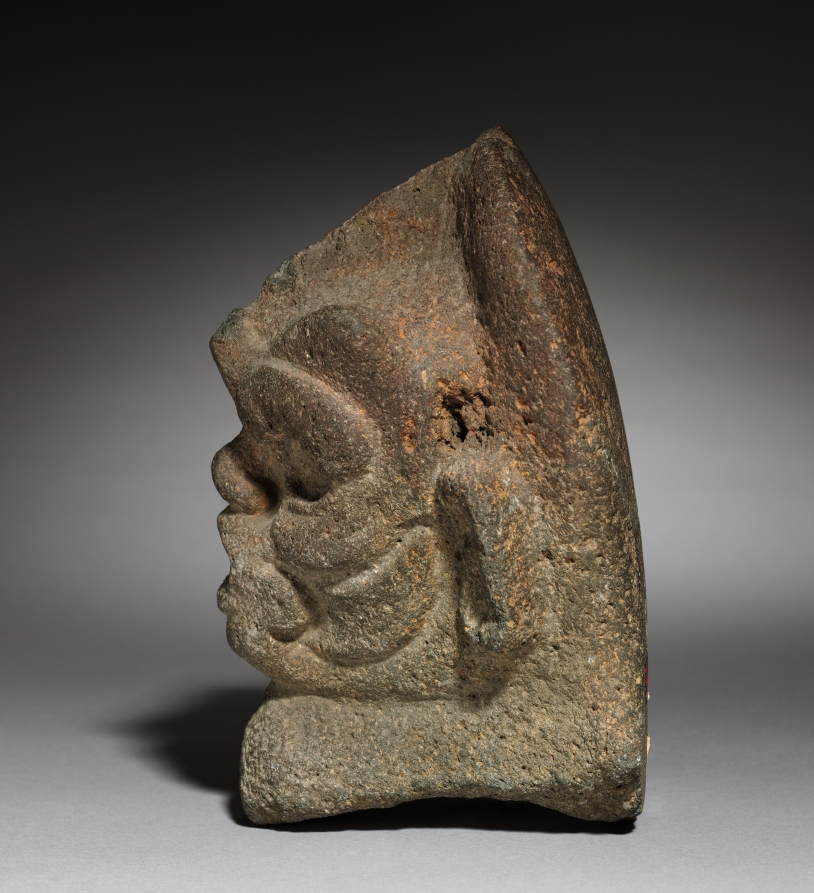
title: Head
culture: Mexico, Classic Veracruz (Totonac or Tajin)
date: 600–1100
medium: stone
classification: Sculpture